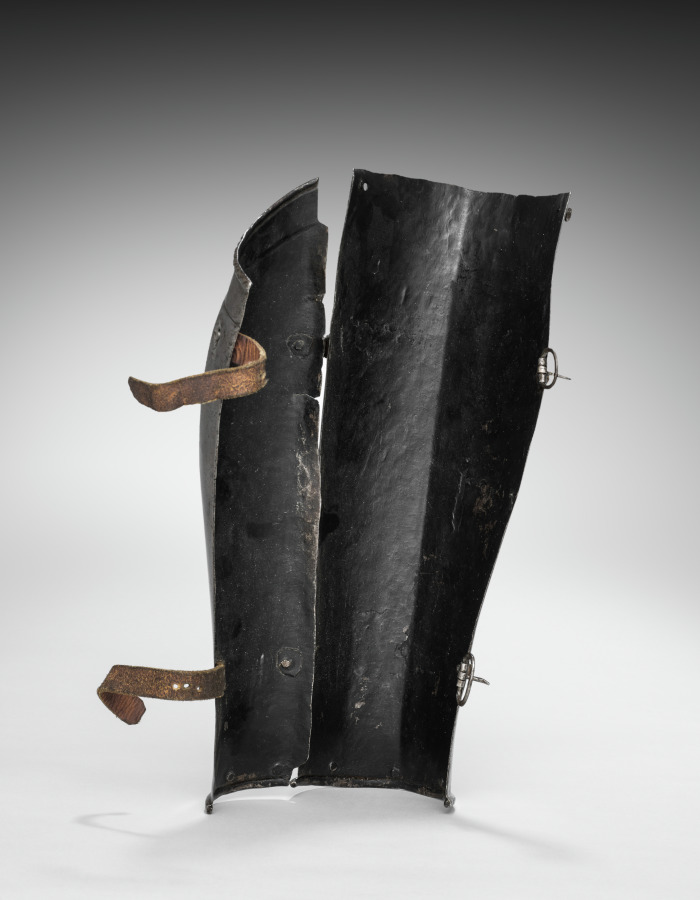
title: Proper Left Greave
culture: South Germany, 16th century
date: c. 1560–80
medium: steel, leather straps, brass rivets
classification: Arms and Armor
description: This armor was developed for the joust-a sporting combat between two mounted contestants. Although all of the elements of this armor date from the same period, they are not all from the same suit. This armor is thus called "composed." It also shows the asymmetry of jousting armor. The participants rode along a wall-like barrier known as a "tilt" with their left sides facing one another. Consequently, armor on that side of the body had to be thicker. Note the large plate (grandguard) over the left shoulder for extra protection. Also, the breathing holes in the helmet were placed on the right side (farthest from an opponent's lance) to avoid injuries from splinters. The bracket attached to the right breastplate is called the lance-rest, a shock-absorbing support designed to accommodate the lance when "couched" under the right armpit.